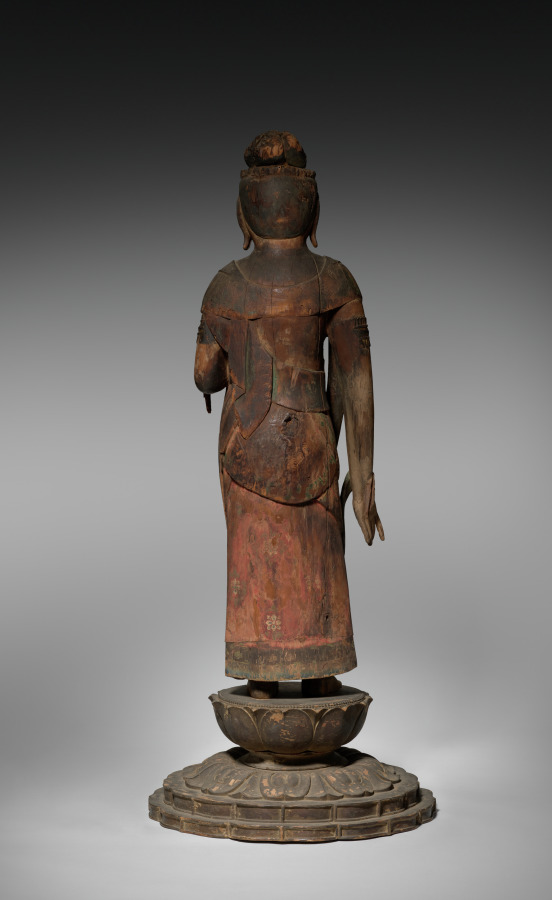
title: Shō Kannon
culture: Japan, Heian period (794–1185)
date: 900s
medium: Wood with traces of color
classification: Sculpture